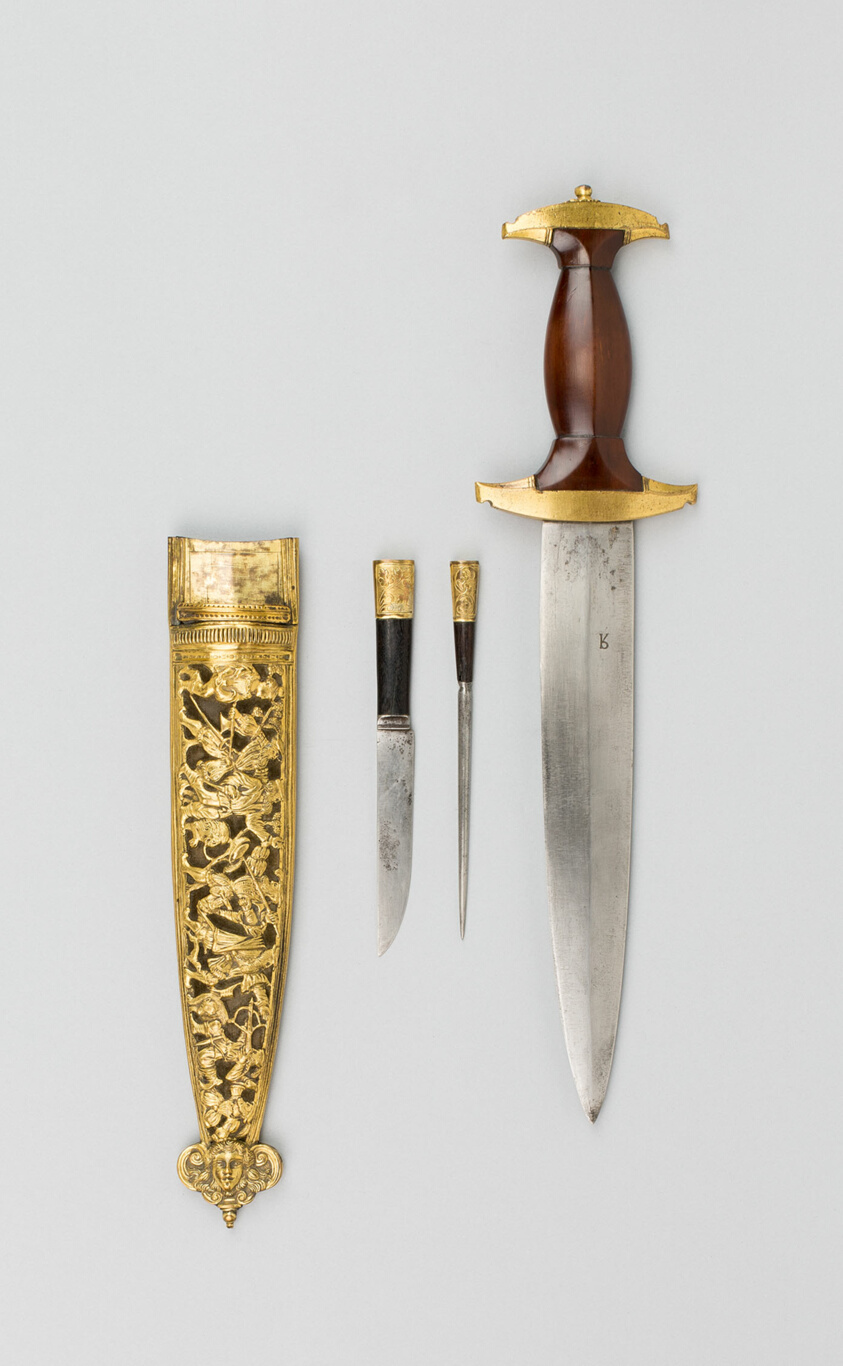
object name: Arms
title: Swiss Dagger with Scabbard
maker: Swiss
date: 1556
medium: Steel, bronze, and walnut Scabbard: bronze, wood, and velvet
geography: Europe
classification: edged weapon-dagger; arms; arms and armor